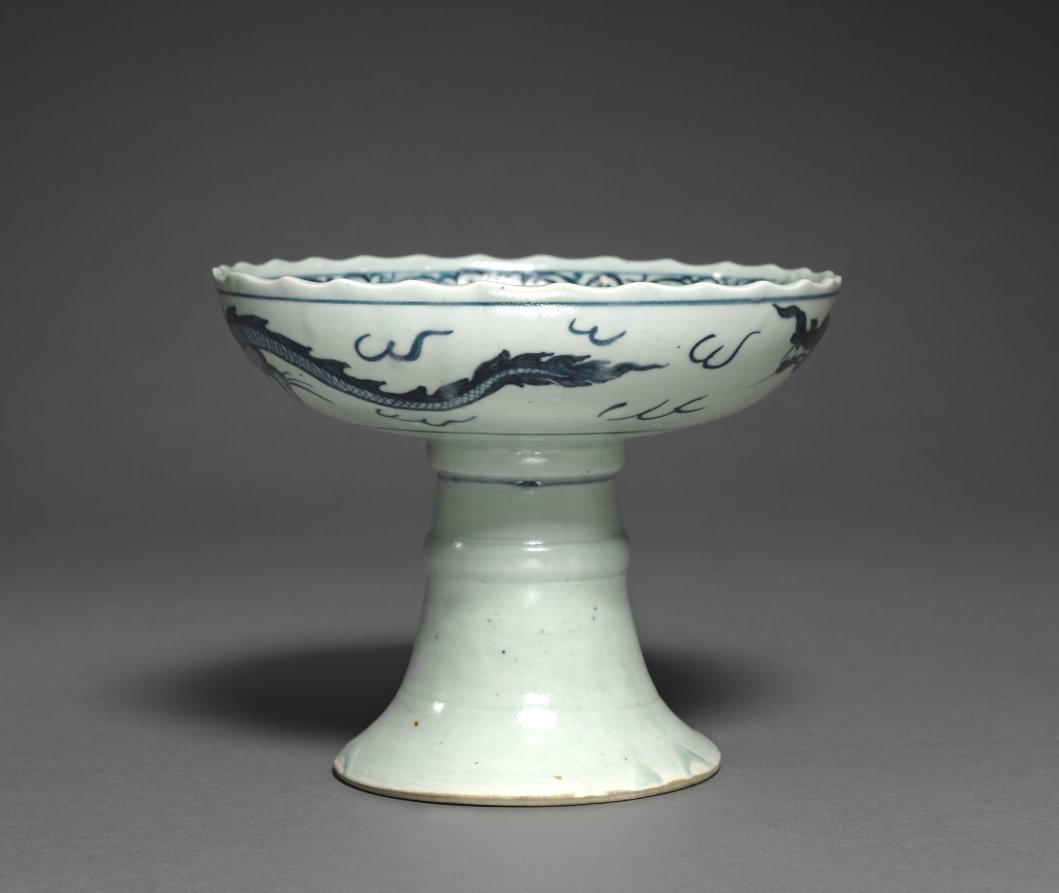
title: Stem Cup with Dragon Decoration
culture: Vietnam (Annam)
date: 1300s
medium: porcelain with underglaze blue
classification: Ceramic